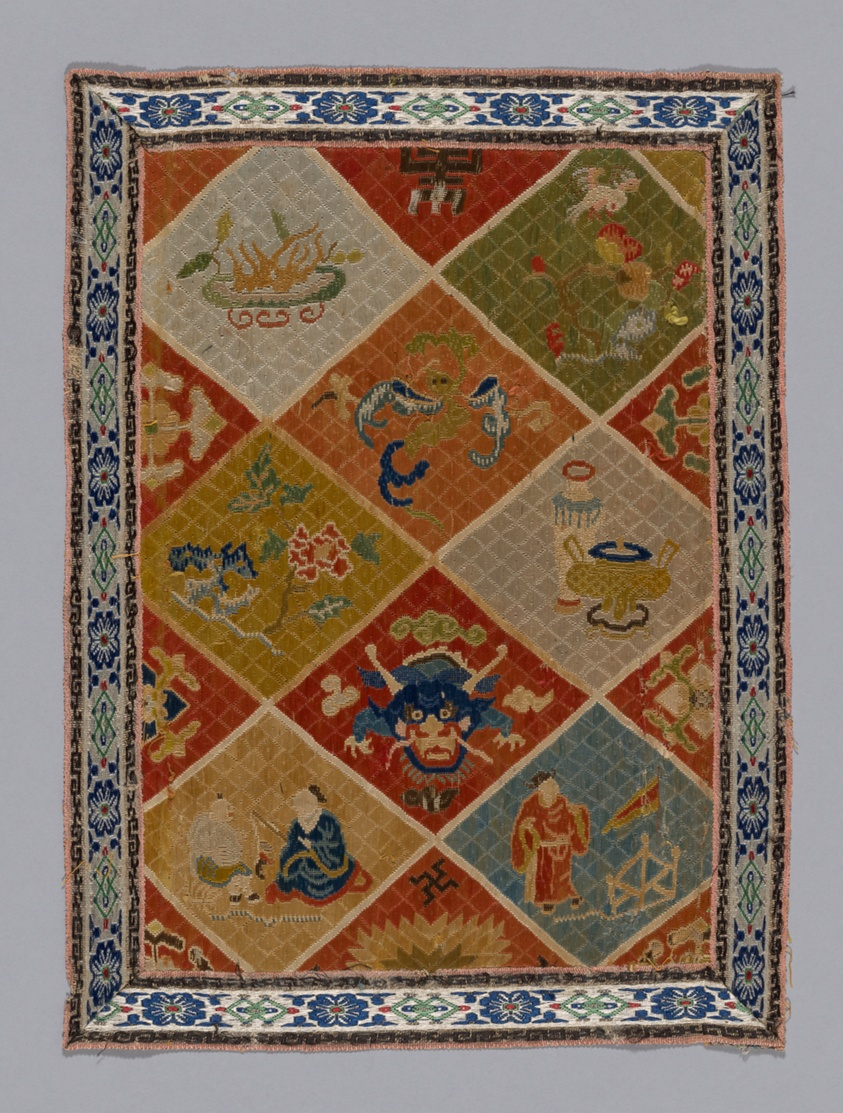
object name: Textile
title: Panel (Dress Fabric)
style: qing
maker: Han-Chinese (China)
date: Qing dynasty (1644–1911), 1875/1900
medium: Geometric patterns with figures and precious things embroidered on gauze.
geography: China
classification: weaving; textile